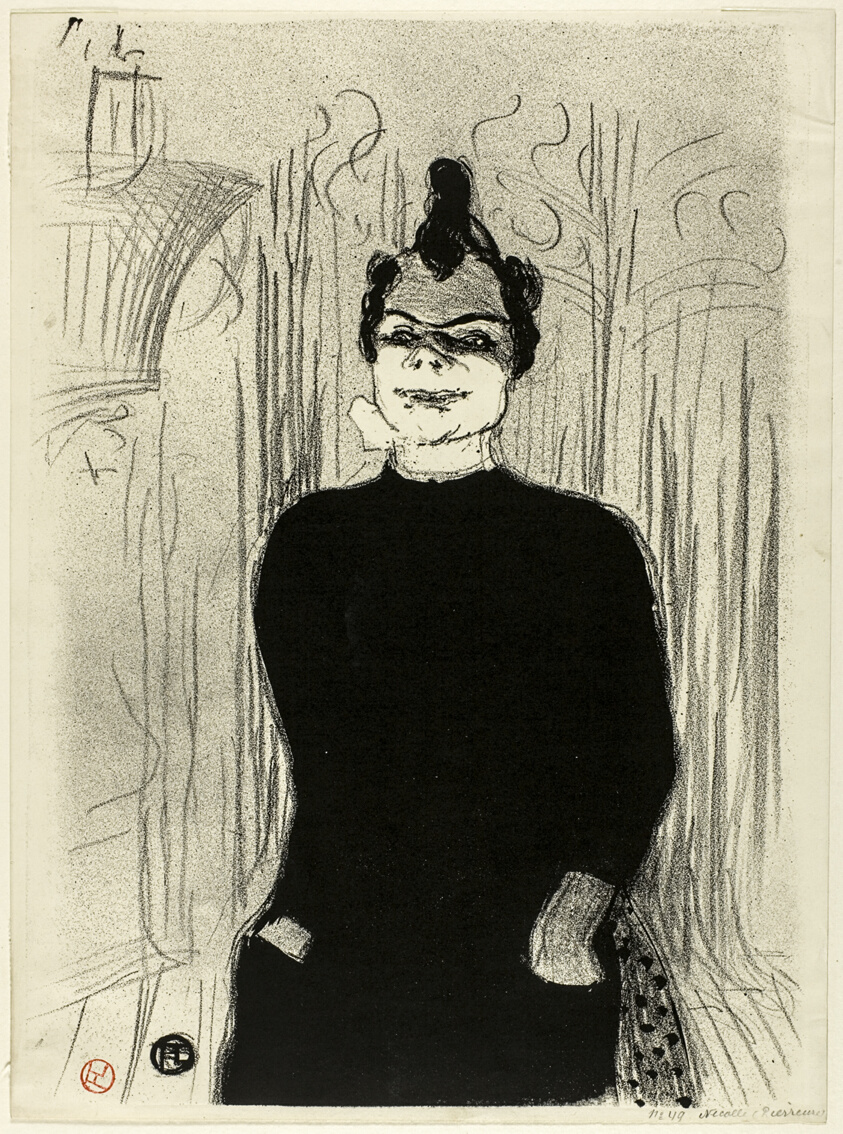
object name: Print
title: At the Gaieté Rochechouart: Nicolle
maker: Henri de Toulouse-Lautrec (French, 1864-1901)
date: 1893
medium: Lithograph on ivory wove paper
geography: France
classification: lithograph; print; prints and drawing